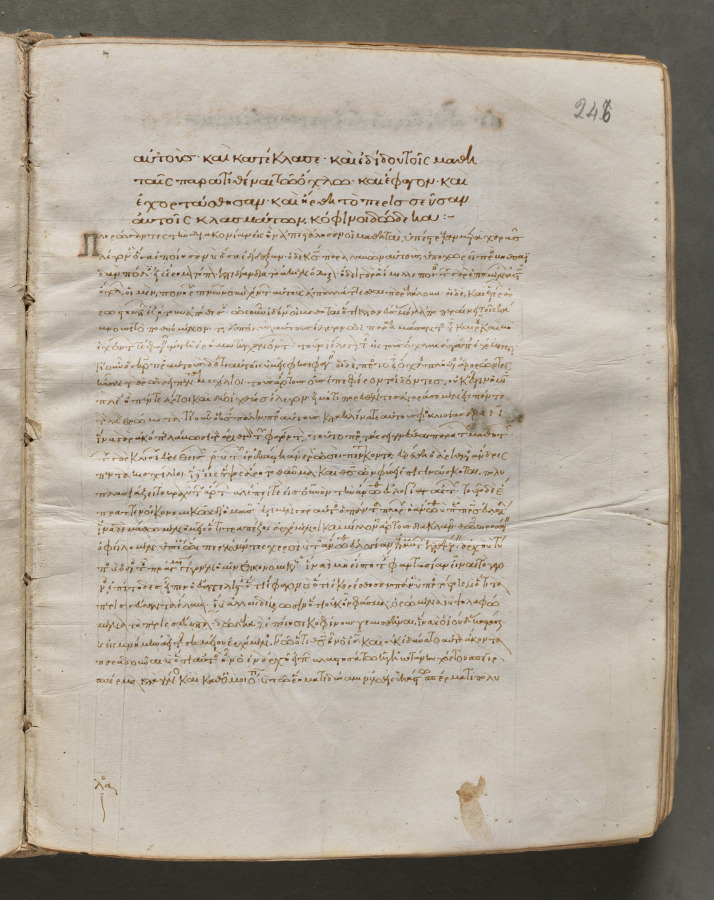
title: Text, folio 246 (recto), from a Gospel Book with Commentaries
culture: Byzantium, Constantinople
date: c. 1000–1100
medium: ink, tempera, and gold on vellum; leather binding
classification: Bound Volume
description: Each of the four gospels in this book opens on a page with brilliantly illuminated borders depicting the author of the text as well as birds—principally peacocks, symbols of the immortality of the soul—and fountains, representing the fountain of life and the salvation of the soul. This volume consists of 428 leaves with texts in Greek. Its level of sophistication suggests that it was probably written and decorated in a monastery in Constantinople.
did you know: Gospel books were carried in procession through Byzantine churches.